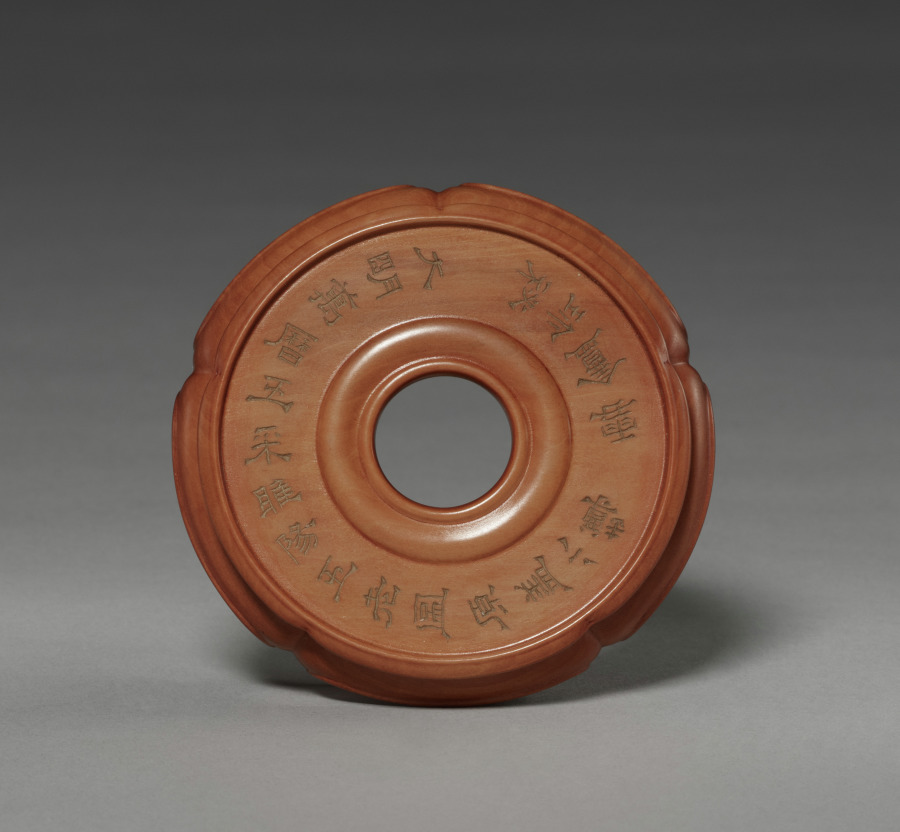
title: Covered Jar (stand)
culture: China, Jiangxi province, Jingdezhen kilns, Ming dynasty (1368-1644), Wanli reign (1573-1620)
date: 1573–1620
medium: porcelain with blue underglaze decoration and overglaze enamels in red, green, and yellow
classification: Wood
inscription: Six character "nien hao" enclosed by double ring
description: In the Ming (1368–1644) and Qing (1644–1911) dynasties, luxury items became more affordable to larger parts of the society, including women, merchants, and literati in non-official positions. Imperial patronage and a growing urban population encouraged consumption of luxury goods and local craftmanship. This covered porcelain jar has blue underglaze and overglaze in red, green and blue enamels. It shows Ming dynasty advancements in porcelain decoration and the creative mind of the talented artisans who made it.